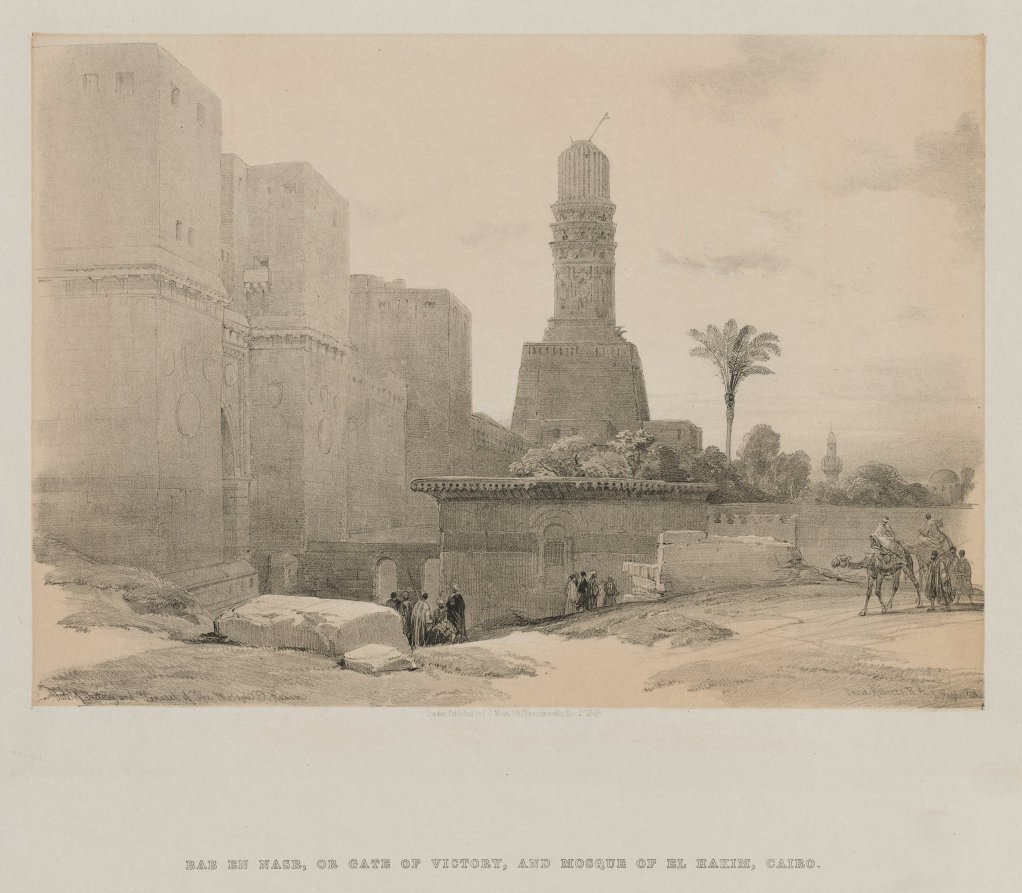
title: Egypt and Nubia, Volume III: Gate of Victory and Minaret of the Mosque El Hakim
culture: England, 19th century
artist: Louis Haghe (British, 1806–1885)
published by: F. G. Moon, 20 Threadneedle Street, London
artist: after David Roberts (Scottish, 1796–1864)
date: 1848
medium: color lithograph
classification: Print